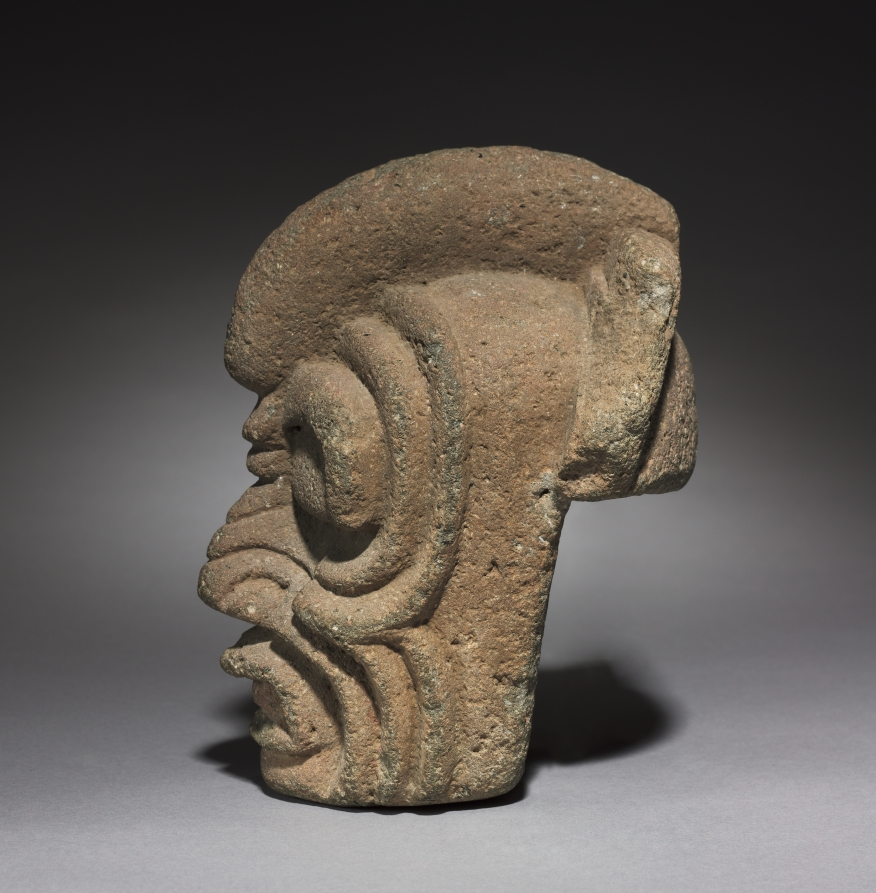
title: Ballgame Stone Head (Hacha)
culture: Mesoamerica, Classic Veracruz style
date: 450–550 CE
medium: gray volcanic stone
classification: Sculpture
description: Little can be said about this head’s identity and meaning, although the deep, dramatic furrows that line the face suggest age and the crest that curves across the top of the head has been compared to that of a bird. Such heads were one element of the regalia used in an ancient ballgame associated with complex mythology and equally elaborate art production on Mexico’s Gulf Coast, in present-day Veracruz.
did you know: This head’s identity is unknown but the deep furrows on the face suggest age.